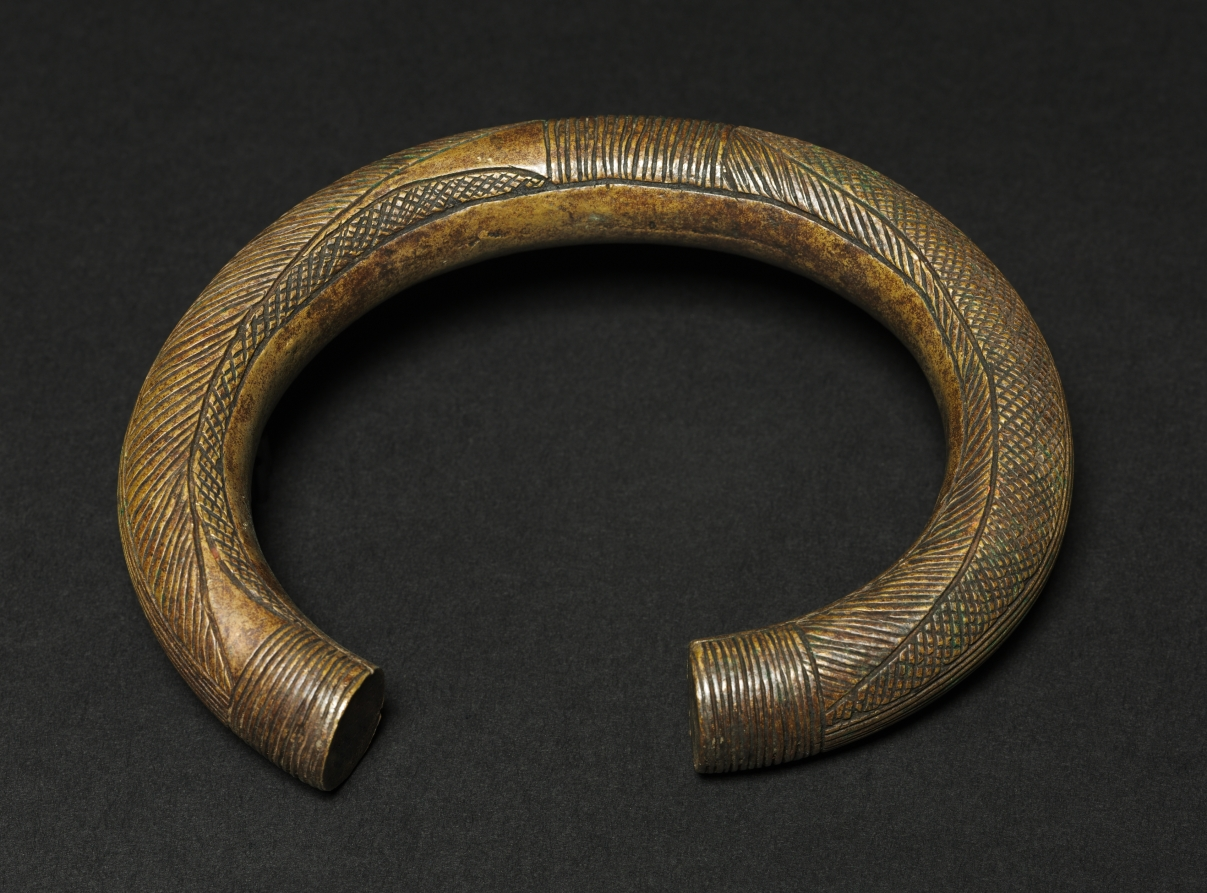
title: Bracelet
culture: Africa, Central Africa, Gabon, Fang-style maker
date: 1900s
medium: Copper alloy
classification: Jewelry